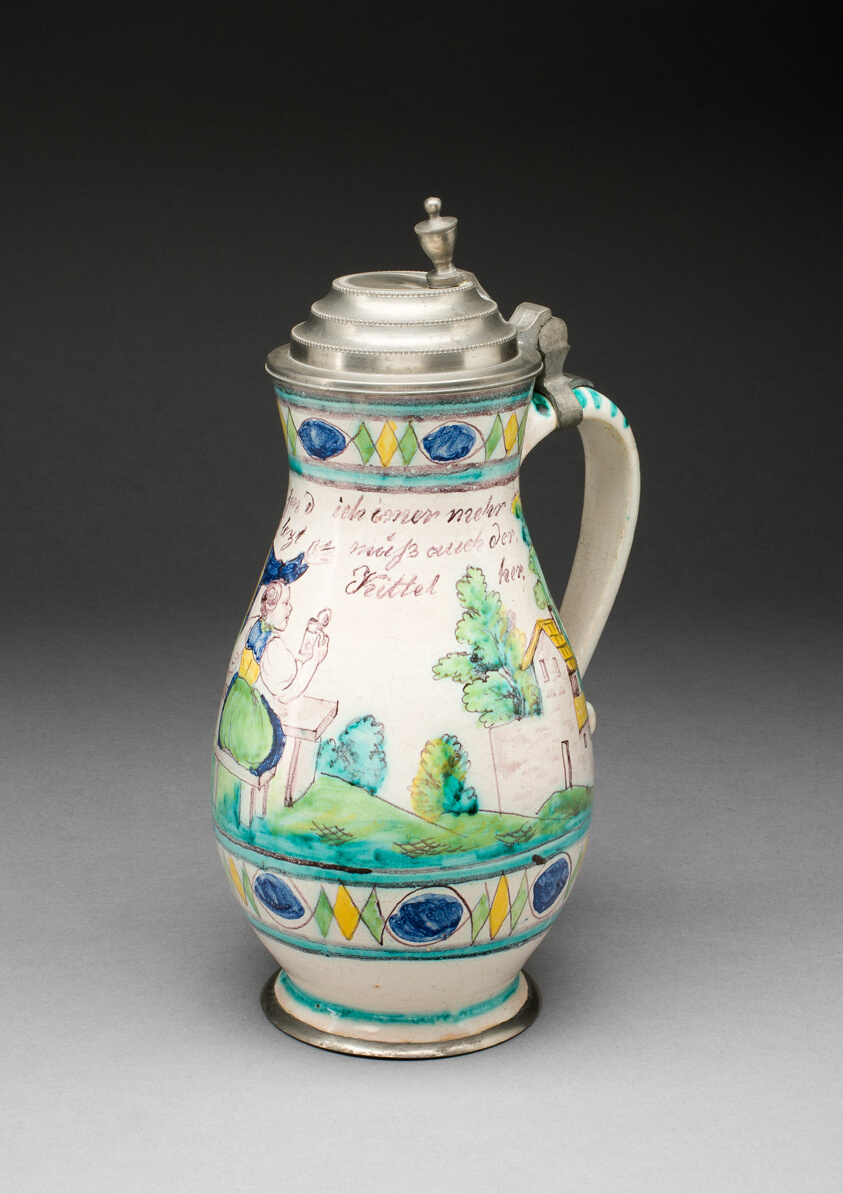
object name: Ceramics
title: Wine Jug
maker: Gmunden, Austria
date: 1800/25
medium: Tin-glazed earthenware (faience) and pewter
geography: Gmunden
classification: ceramics; european decorative arts